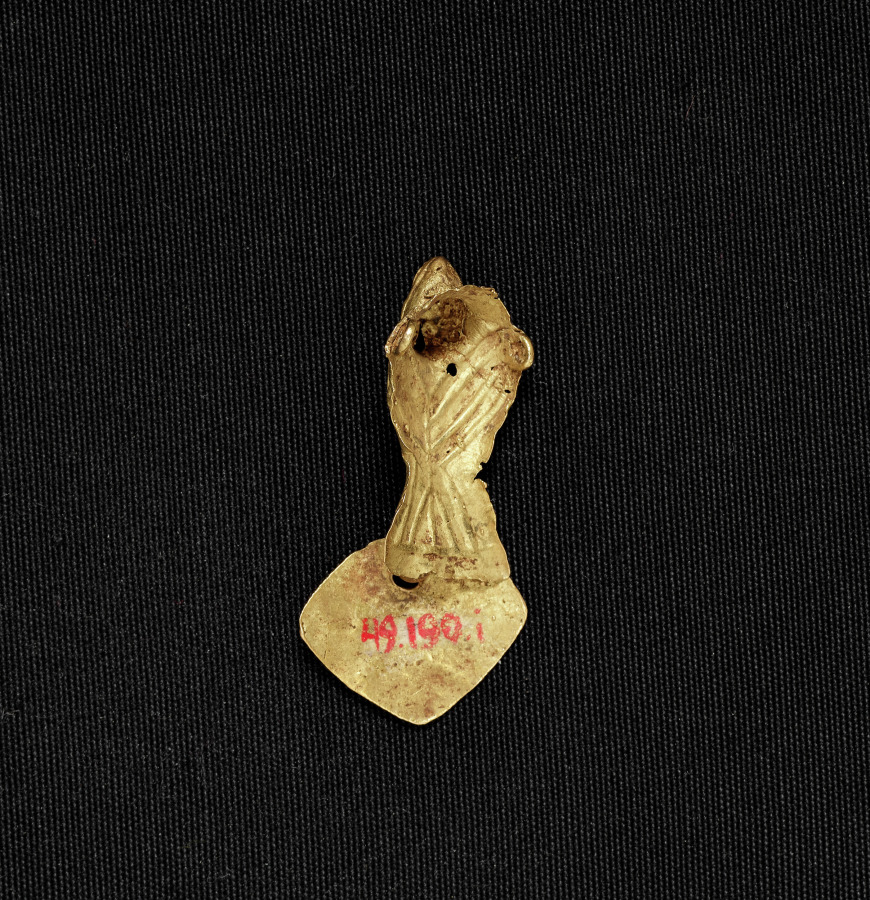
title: Bird Bead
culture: Colombia, Muisca style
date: c. 900–1550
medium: cast gold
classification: Jewelry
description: Muisca metalwork divides into two categories: ornaments to be worn, such as these, and offering figurines, in the case to the right. The elaborate bird pendant features delicate herringbone moldings, openwork patterns, and wing details-all part of the wax model from which the pendant was cast (see nearby computer animation). The dangles were attached after casting.